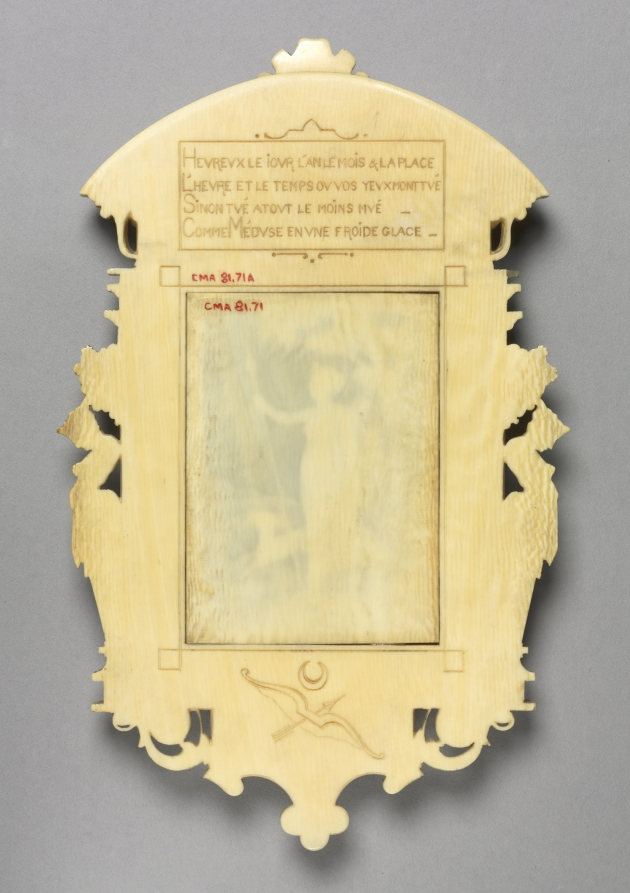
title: Framed Relief of Diana the Huntress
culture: France(?)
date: c. 1850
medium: ivory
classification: Sculpture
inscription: reverse: above is inscribed a poem in French.